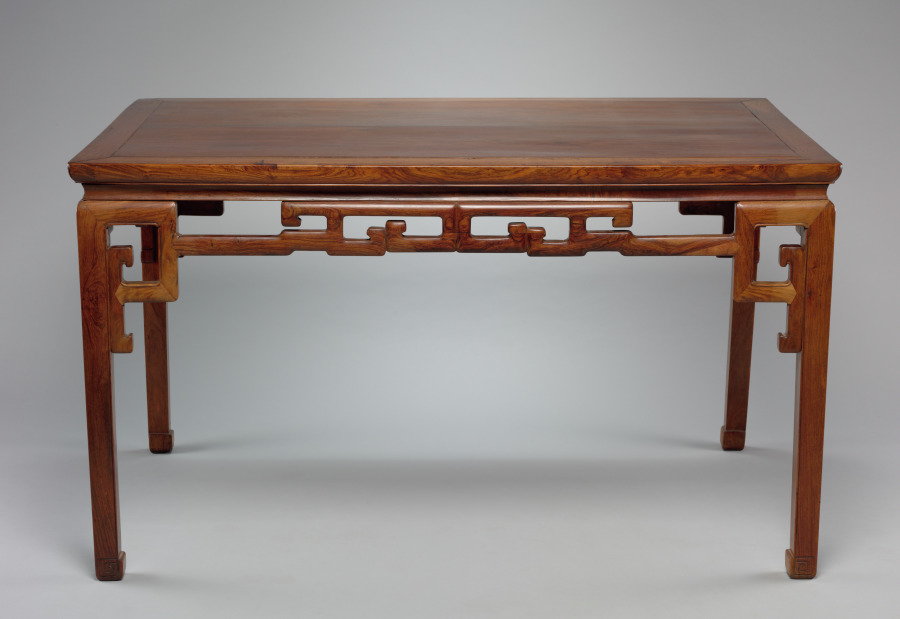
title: Center Table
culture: China, Ming dynasty (1368-1644) - Qing dynasty (1644-1911)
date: 1600s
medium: huali (ptero-carpus indicus [Burmese or East Indian Rosewood])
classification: Furniture and woodwork